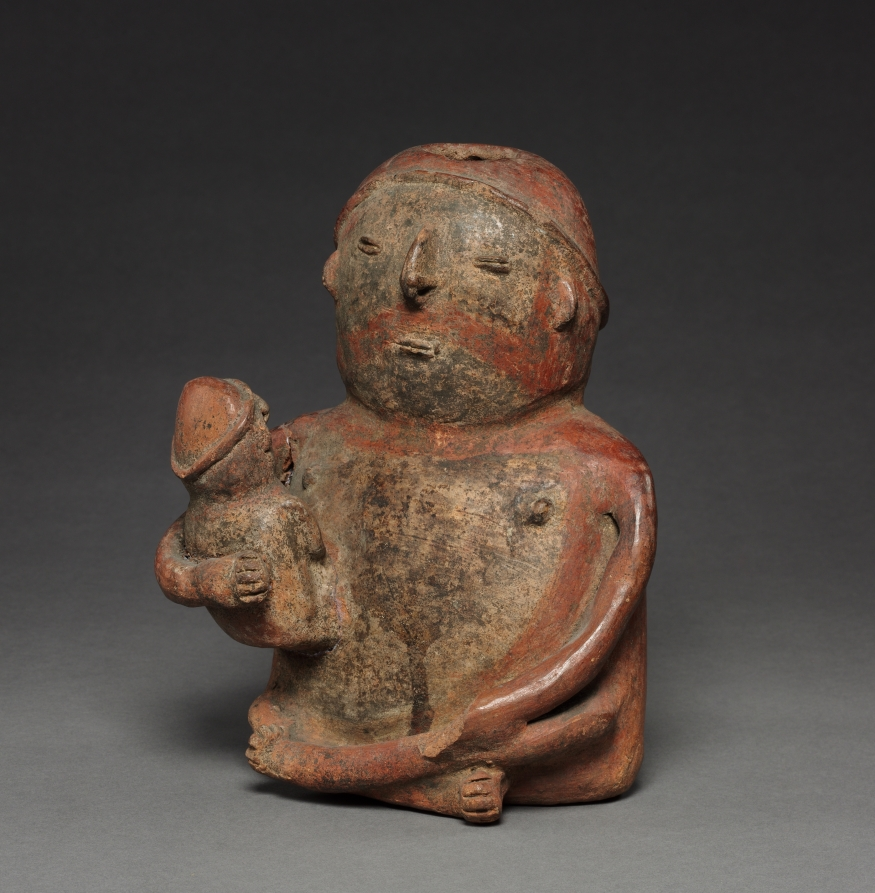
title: Figures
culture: Colombia, 18th-19th century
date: before 1921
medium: red ware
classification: Ceramic